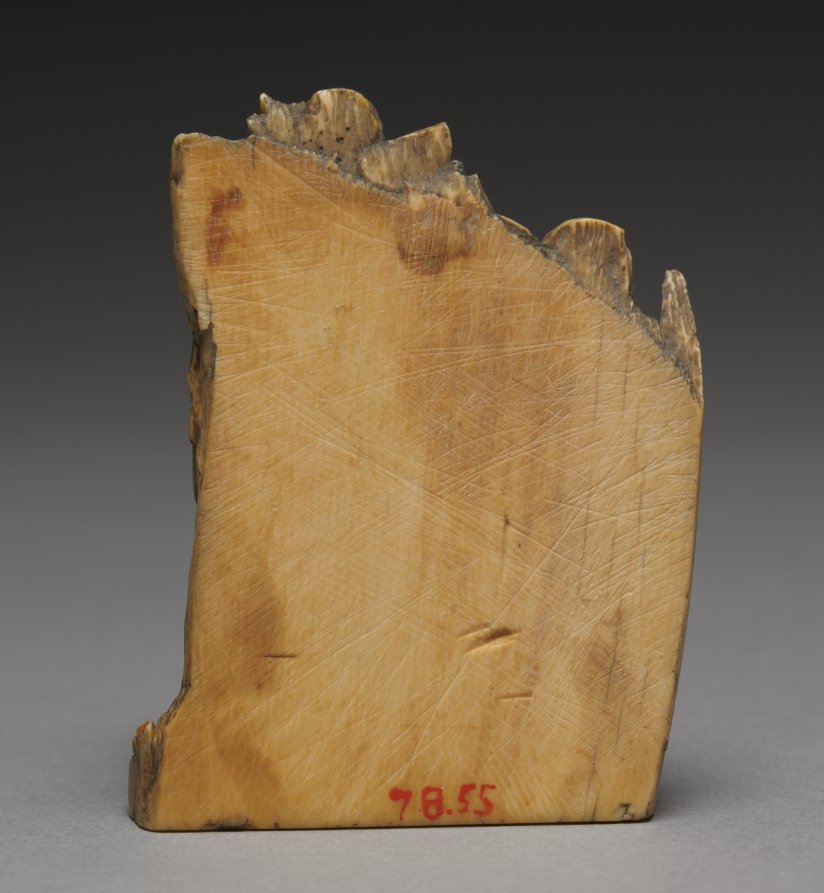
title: The Crucifixion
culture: France, Paris?, Gothic period, late 13th-early 14th century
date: c. 1290–1320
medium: ivory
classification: Ivory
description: Flanking the crucified Christ, the figures of Longinus and the Virgin appear on this fragment of an exquisitely carved ivory panel. Now lost are the figures of Stephaton and Saint John. However, Stephaton’s right foot and the vinegar-soaked sponge on a pole are still visible where the ivory breaks off.